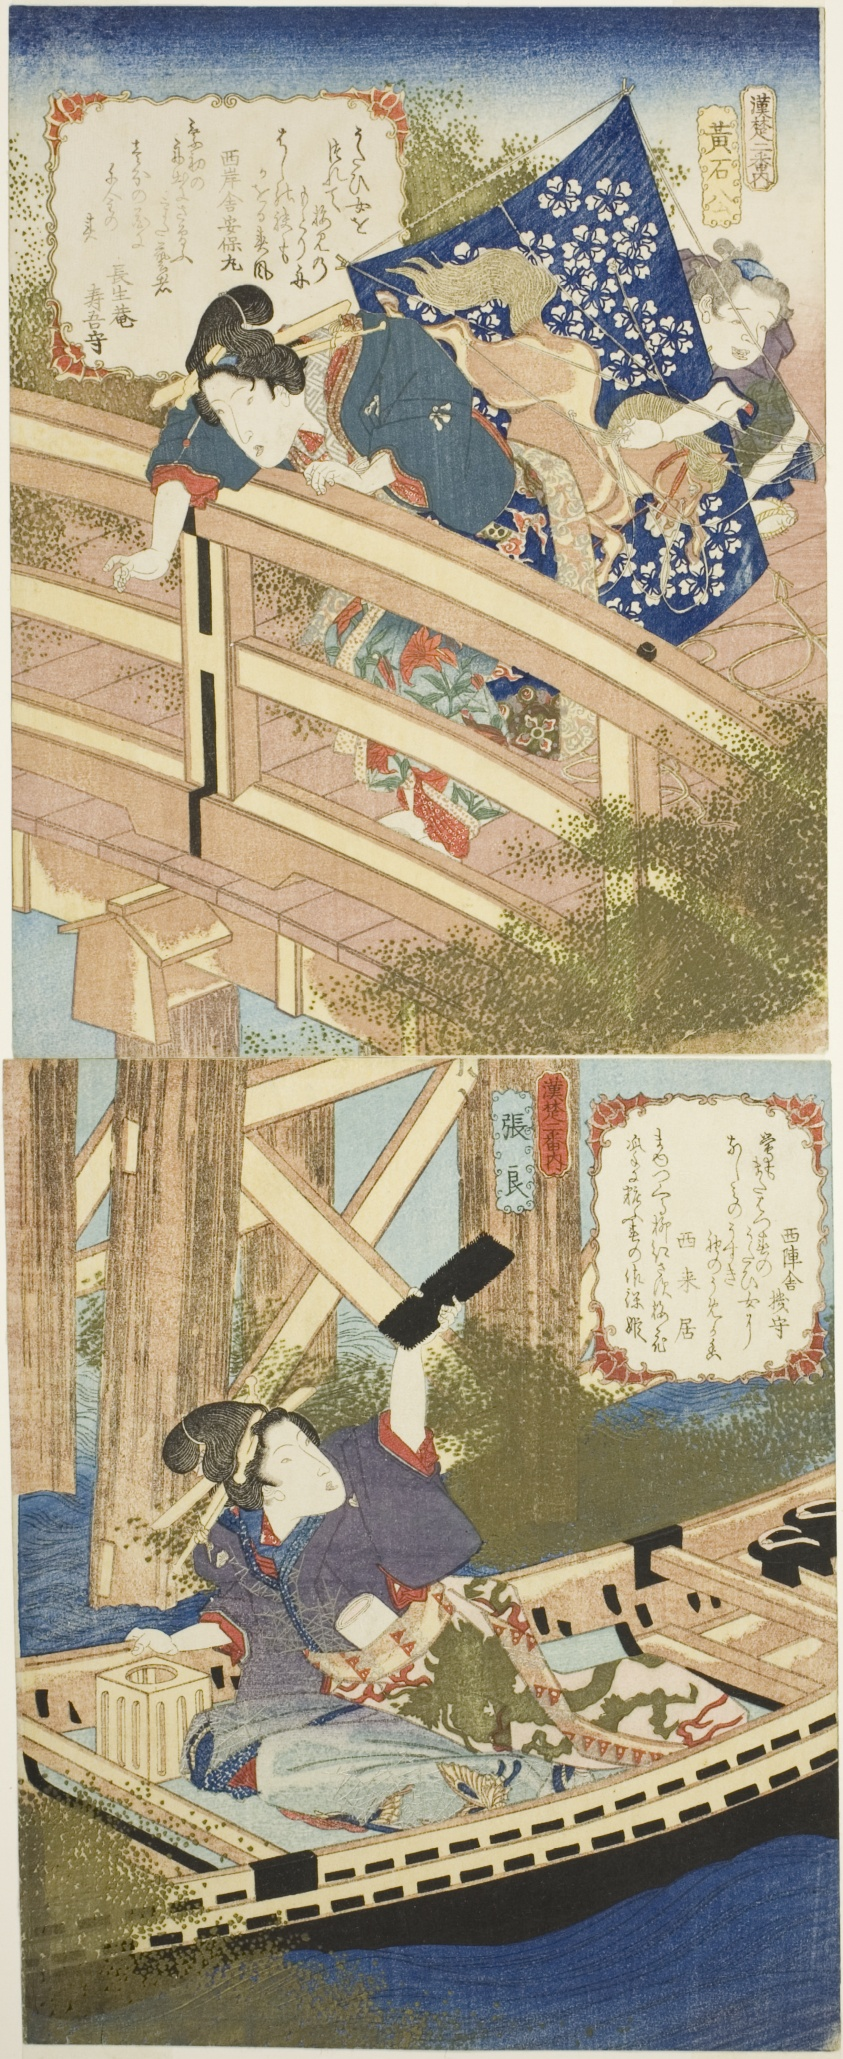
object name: Print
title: Huang Shigong (Kosekiho) and Zhang Liang (Choryo), from "A Set of Two on the States of Han and Chu (Kanso niban no uchi)"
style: Japanese (culture or style)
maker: Attributed to Yanagawa Shigenobu II; Japanese, active c. 1820s-late 1850s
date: 1834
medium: Color woodblock print; shikishiban diptych, surimono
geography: Japan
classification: print; asian art